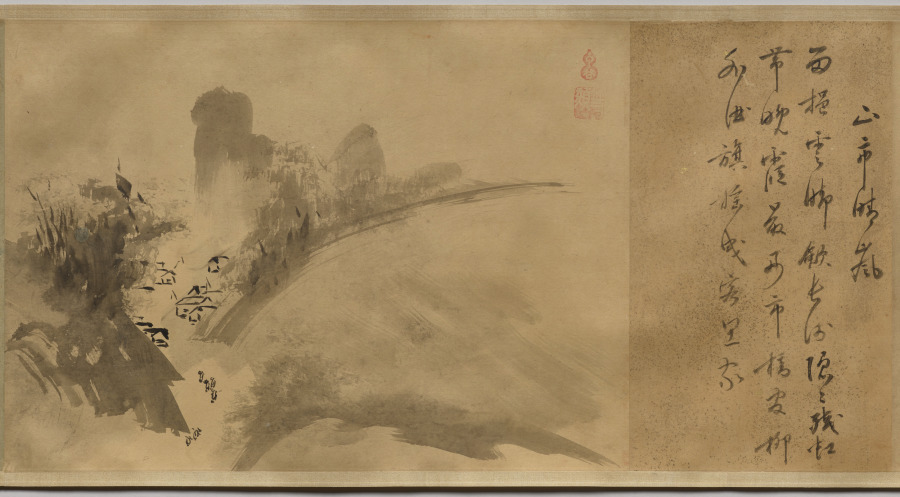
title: Poems and Pictures of the Eight Views of Xiao-Xiang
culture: Japan, Momoyama period (1573–1615)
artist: Unkoku Tōgan (Japanese, 1547–1618)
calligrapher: Inkei Gentetsu (Japanese, 1562–1612)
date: 1605–12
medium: Handscroll; ink on paper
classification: Painting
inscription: Each painting sealed with red gourd-shaped seal reading Unkoku (雲谷) and a square seal reading Tōgan (等顔).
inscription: Each painting prefaced with a titled poem on the Eight Views of Xiao-Xiang by Yujian Ruofen (active late 13th century) inscribed by Japanese Buddhist monk Inkei Gentetsu (1562–1612).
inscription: 右寫玉㵎之筆勢／雪舟末葉等顔筆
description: Unkoku Tōgan brushed these scenes using the splashed-ink technique associated in Japan with the Chinese monk Yujian Ruofen (active late 1200s). Xiao-Xiang refers to the region in present-day Hunan province, where the Xiang River and its tributaries converge. Each of the eight views evokes a time of day or season. The earliest surviving series of Xiao-Xiang paintings is by Wang Hong (active mid-1100s), but textual evidence tells us the theme appears earlier. It was later adopted in Japan and Korea, as seen here. The poems were inscribed by Inkei Gentetsu, the third abbot of the Rinzai Zen temple Tōshunji, Japan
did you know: The “Tō” of Tōgan comes from the name of painter Sesshū Tōyō (1420–1506).